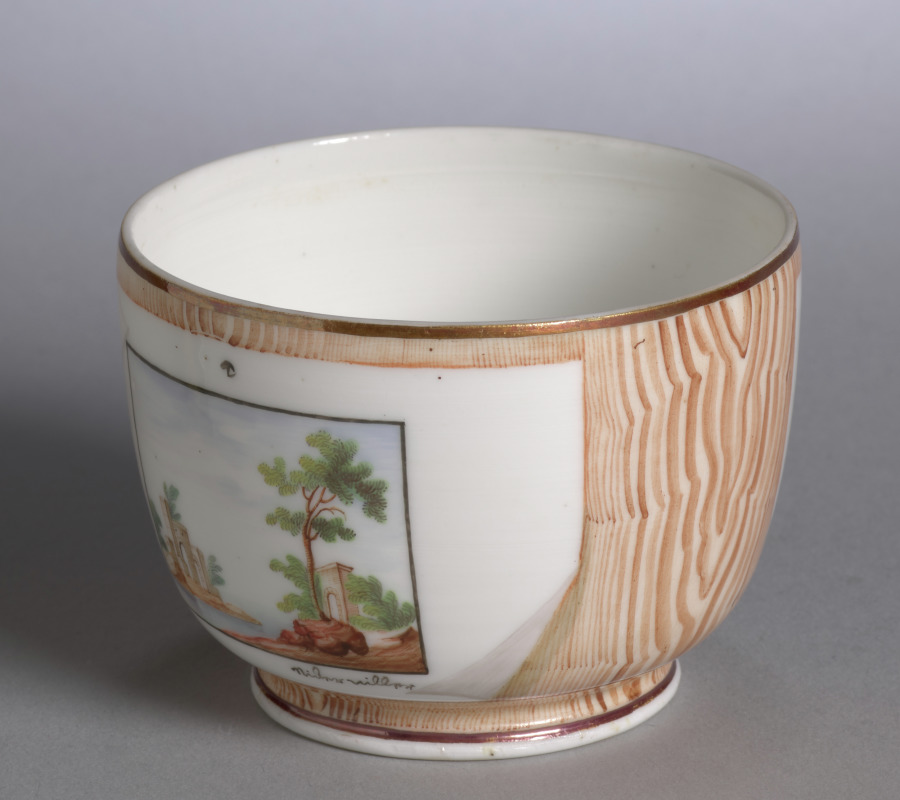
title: Bowl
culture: France, 18th century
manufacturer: Niderviller Factory (French)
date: c. 1780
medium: porcelain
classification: Ceramic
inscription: inscribed at lower right corner of two trompe l'oeil prints: Niderviller.